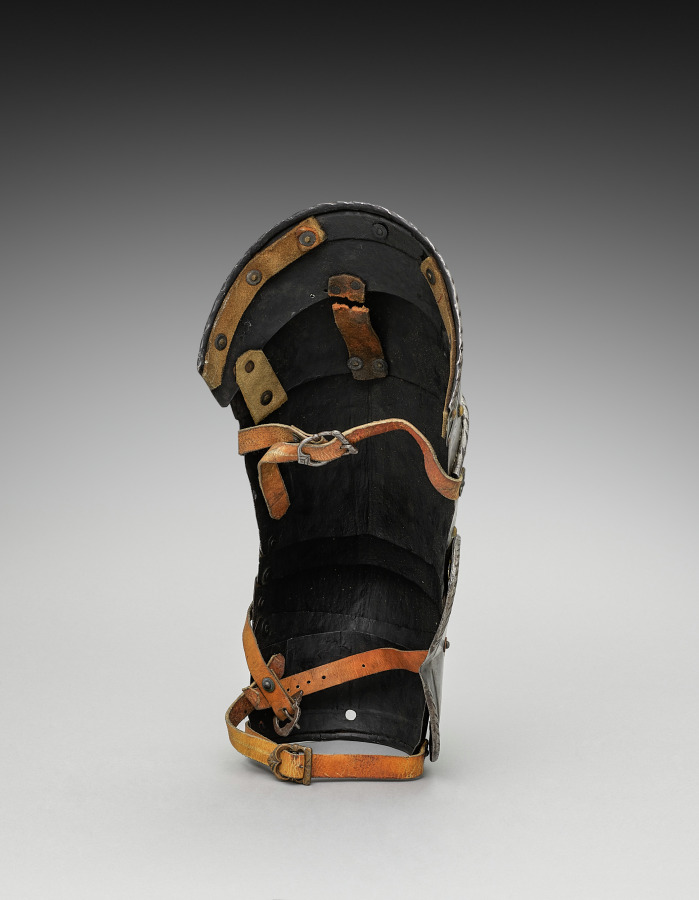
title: Right Cuisse with Poleyns (knee-cops)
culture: Germany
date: c.1550–1570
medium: iron, steel, leather and brass rivets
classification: Arms and Armor